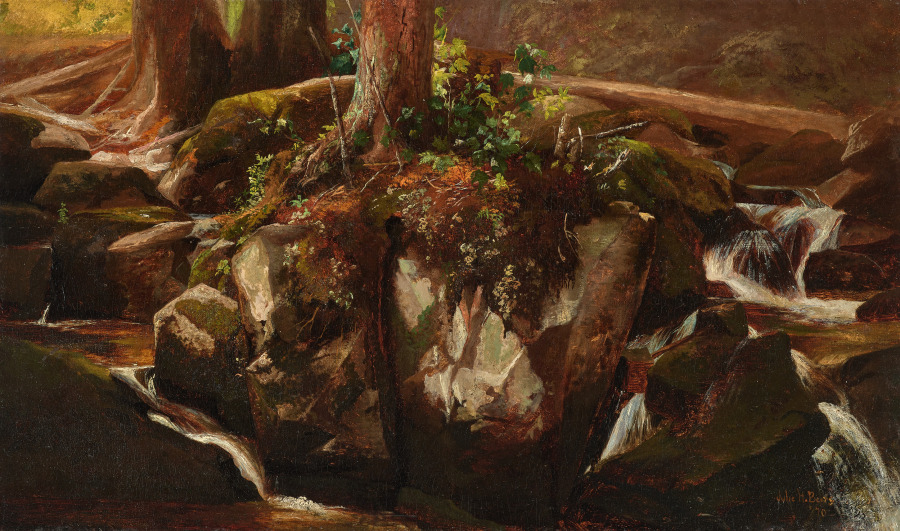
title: A Mountain Stream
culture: America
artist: Julie H. Beers (American, 1835–1913)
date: 1870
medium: oil on canvas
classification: Painting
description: At a time when women faced many barriers, Julie H. Beers became one of the first women from the United States to have a successful career as a landscape painter. In addition to selling her work, she earned income by organizing instructional outdoor sketching trips for women in upstate New York and New England. Although its location was not recorded, A Mountain Stream was likely painted on her summer trip to New Hampshire’s White Mountains in 1870. Rendered close-up from a low vantage point, its intimately scaled composition features tree roots, angled boulders, patches of moss, pockets of vegetation, and gentle cascades of water.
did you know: Julie H. Beers learned how to paint from two of her brothers, William Hart and James McDougal Hart, whose works are also in the museum's collection.